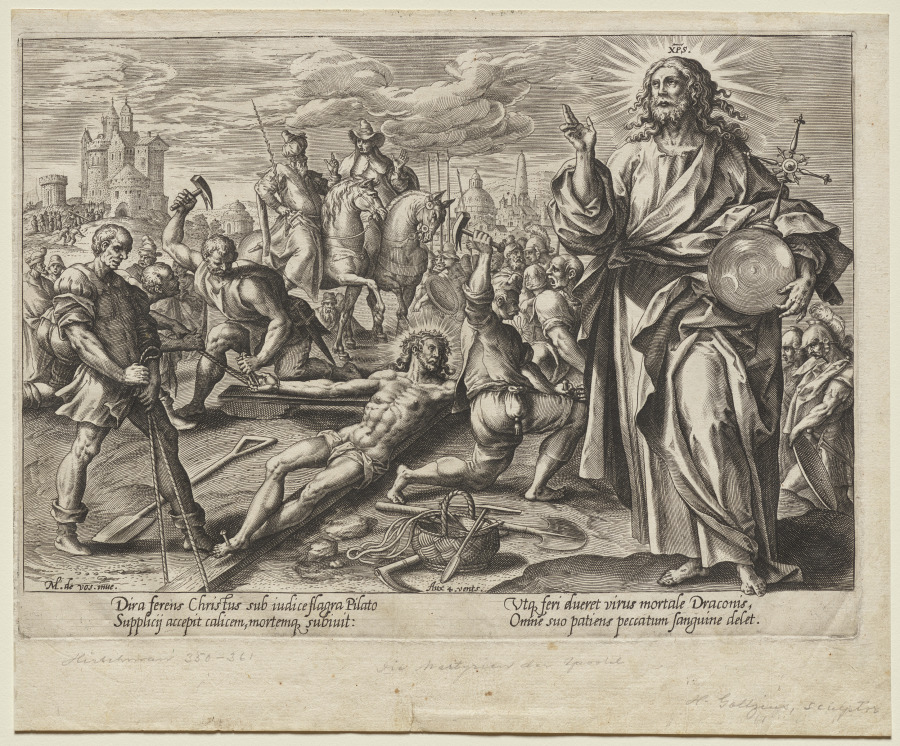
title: Christ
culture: Netherlands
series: Christ, St. Paul, and the Twelve Apostles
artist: Hendrick Goltzius (Dutch, 1558–1617)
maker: after Maarten de Vos (Flemish, 1532–1603)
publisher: Aux Quatre Vents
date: c. 1578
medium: engraving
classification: Print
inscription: M. de Vox. Inue. bottom left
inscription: Aux 4. vents., center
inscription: Verses in lower margin: Dira ferens Christus…sanguine delet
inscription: Above the head of Christ: XPS